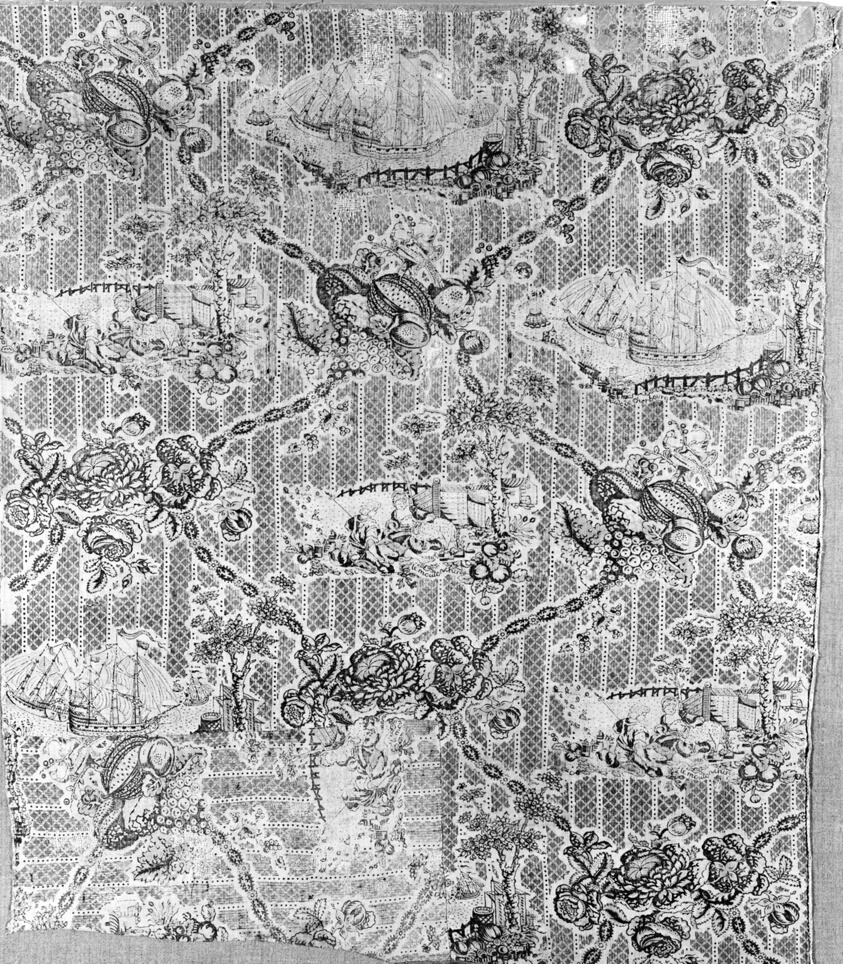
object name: Textile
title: Rade de Cherbourg (Furnishing Fabric)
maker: France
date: 18th century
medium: Linen, plain weave; block printed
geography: France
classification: textile; weaving - printed; furnishing textile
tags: propaganda